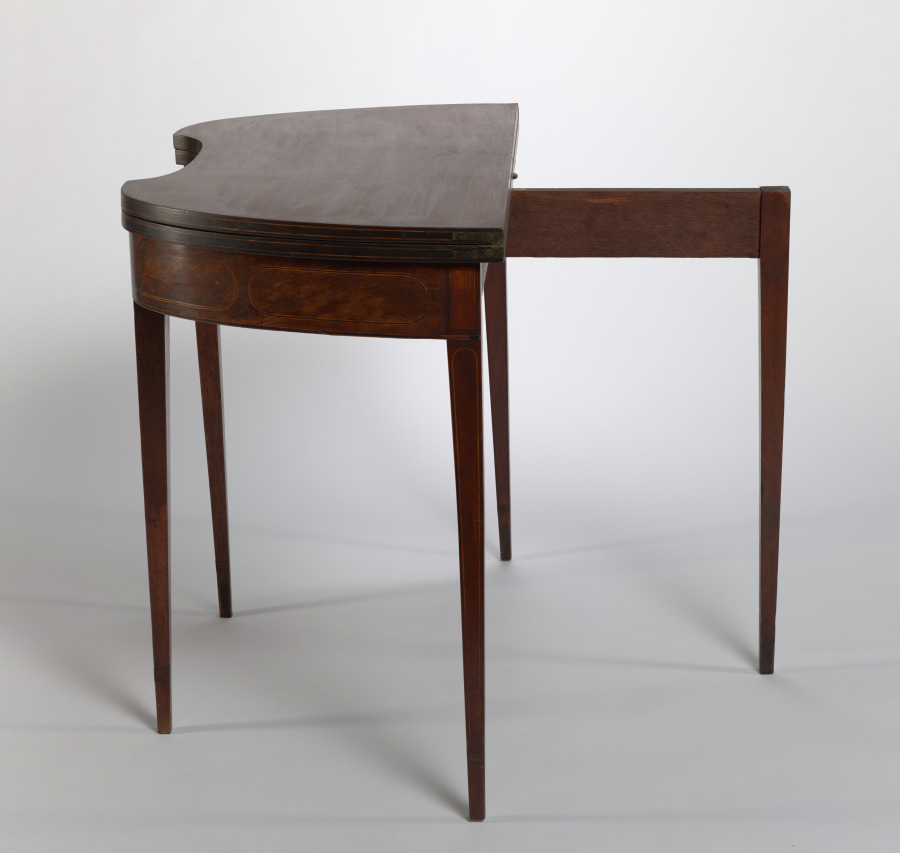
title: Game Table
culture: America, Maryland, Baltimore, early 19th Century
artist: style of George Hepplewhite (American, 1786)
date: c. 1800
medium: mahogany with inlays of various woods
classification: Furniture and woodwork